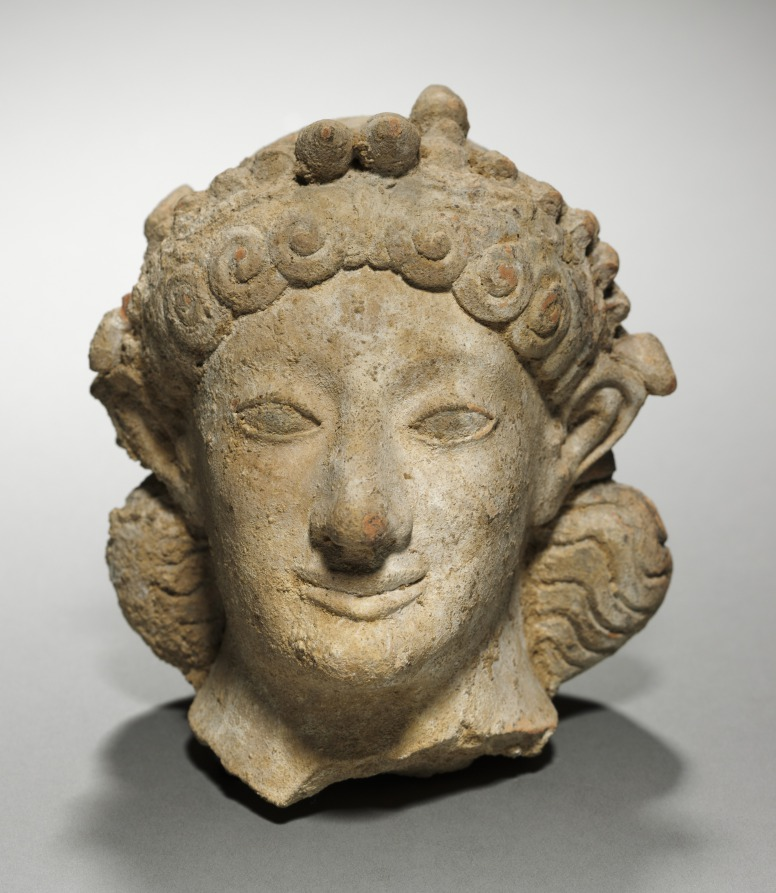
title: Head of Artemis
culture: Greece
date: 600–575 BCE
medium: terracotta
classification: Sculpture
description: Artemis was the goddess of hunting. Her long straight nose, almond-shaped eyes, and "archaic smile" are very similar to those of Atalanta on the contemporary white-ground lekythos (1966.114)